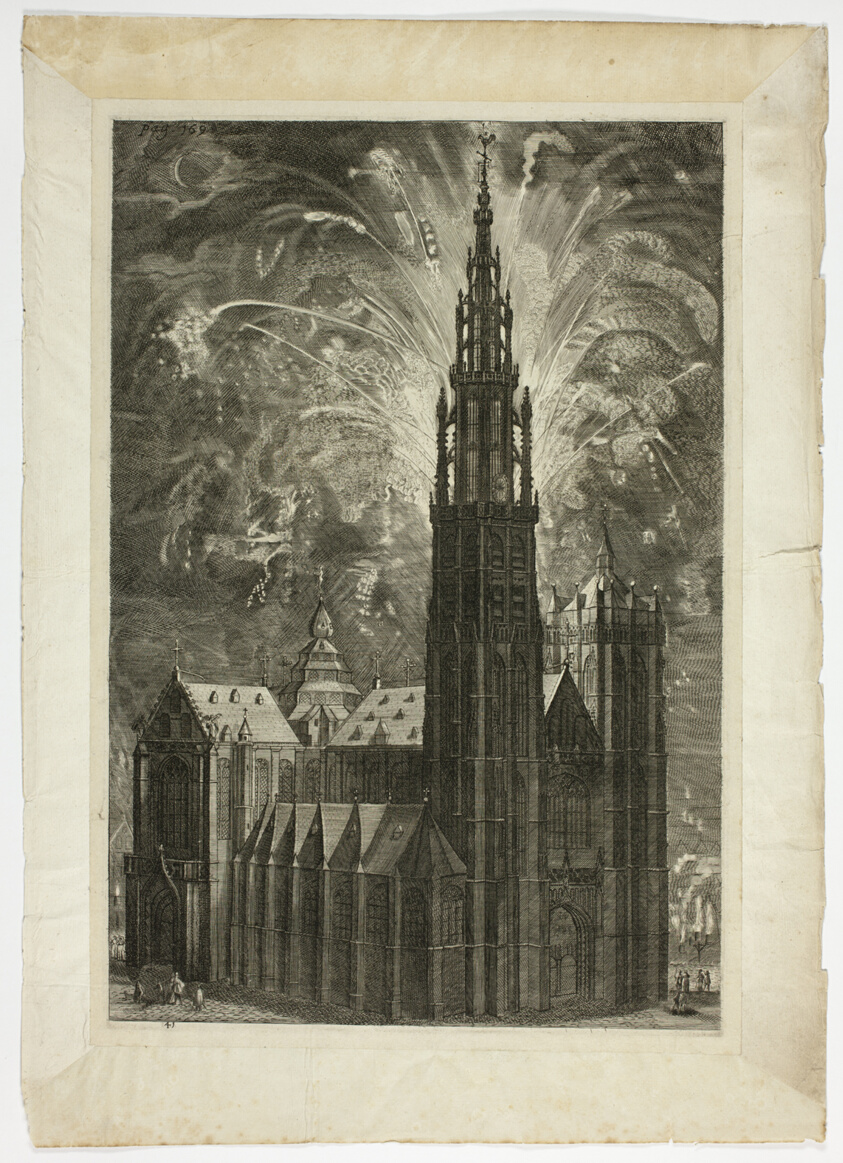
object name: Print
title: Firework around the Antwerp Cathedral, plate 41 from Casperius Gevartius, Pompa Introitus Honori Serenissimi Principis Ferdinandi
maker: Unknown Artist; Flemish, mid-17th century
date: 1642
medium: Engraving, with etching and plate tone, in black on cream laid paper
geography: Flanders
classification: engraving; paper; print; prints and drawing